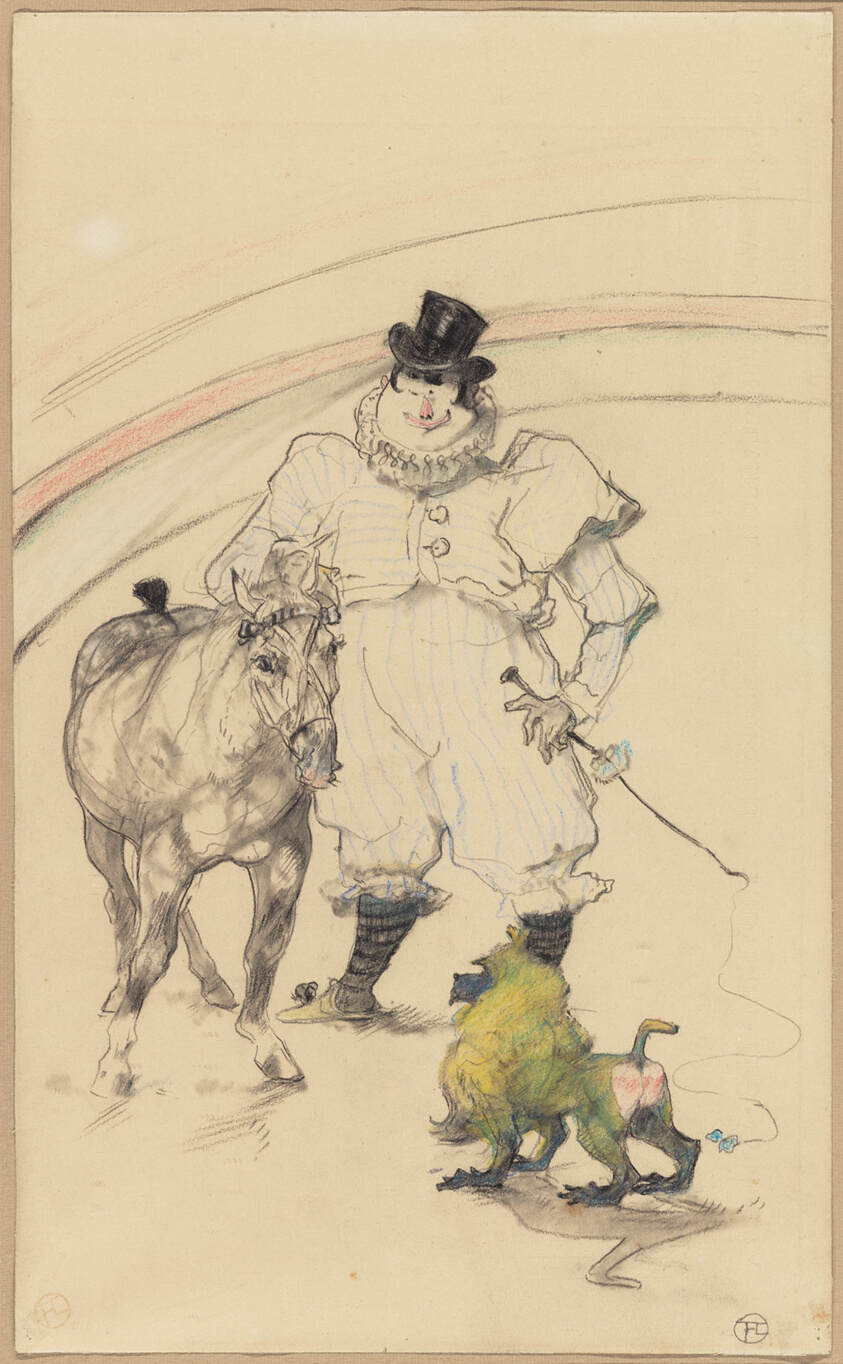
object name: Drawing and Watercolor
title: At the Circus: Trained Pony and Baboon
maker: Henri de Toulouse-Lautrec (French, 1864-1901)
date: 1899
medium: Pastel and graphite on cream wove paper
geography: France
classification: crayon; drawings (visual works); prints and drawing